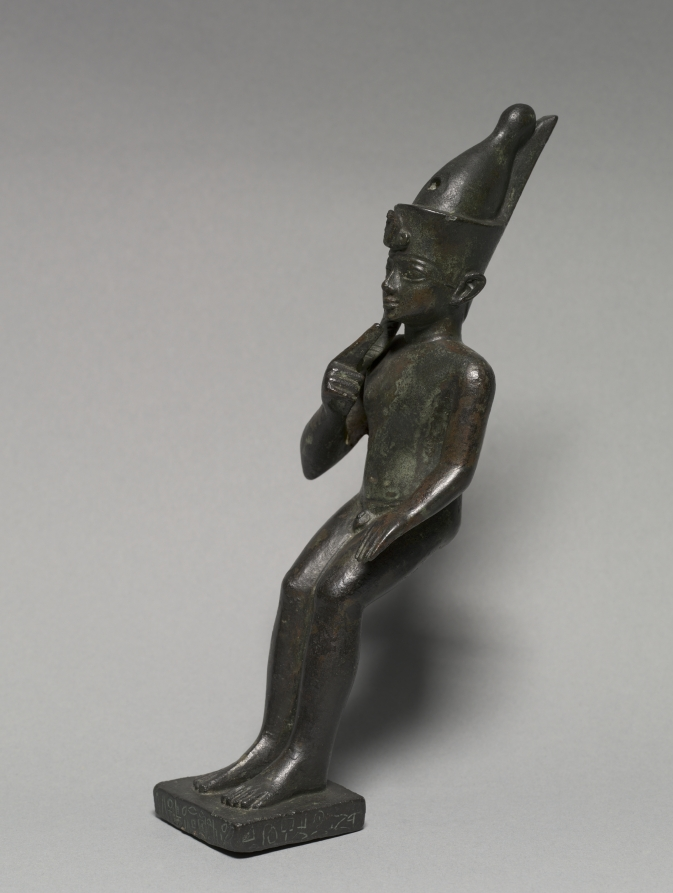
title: Statuette of Harpocrates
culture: Egypt, Greco-Roman period (332 BCE–395 CE), Ptolemaic dynasty (305–30 BCE)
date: 304–30 BCE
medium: bronze, solid cast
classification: Sculpture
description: Horus the Child (Harpocrates) was always shown in the childish attitude of holding a finger to his mouth.